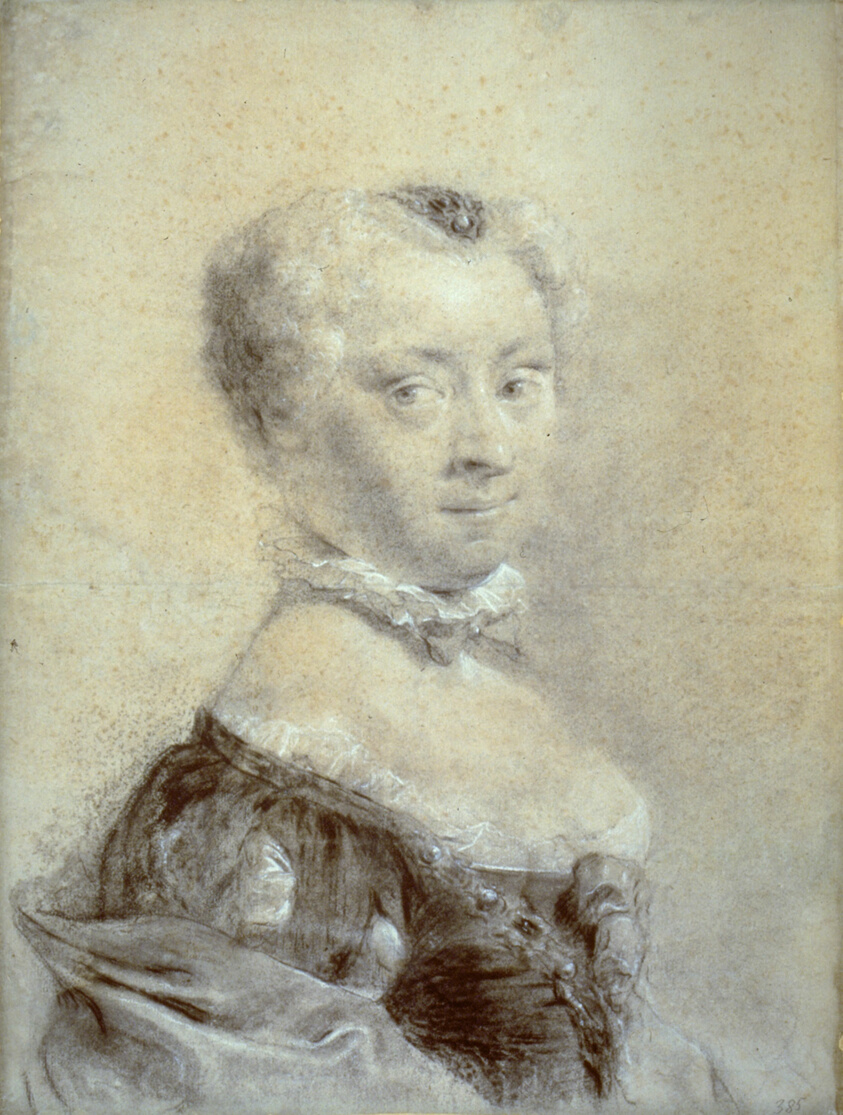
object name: Drawing and Watercolor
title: Portrait of Sophie Juliane von der Schulenburg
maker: Giovanni Battista Piazzetta (Italian, 1682-1754)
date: c. 1531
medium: Black chalk with stumping, heightened with touches of white chalk, over traces of charcoal, on blue-gray laid paper, discolored to cream, laid down on cream wood pulp board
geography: Italy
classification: chalk; drawings (visual works); prints and drawing